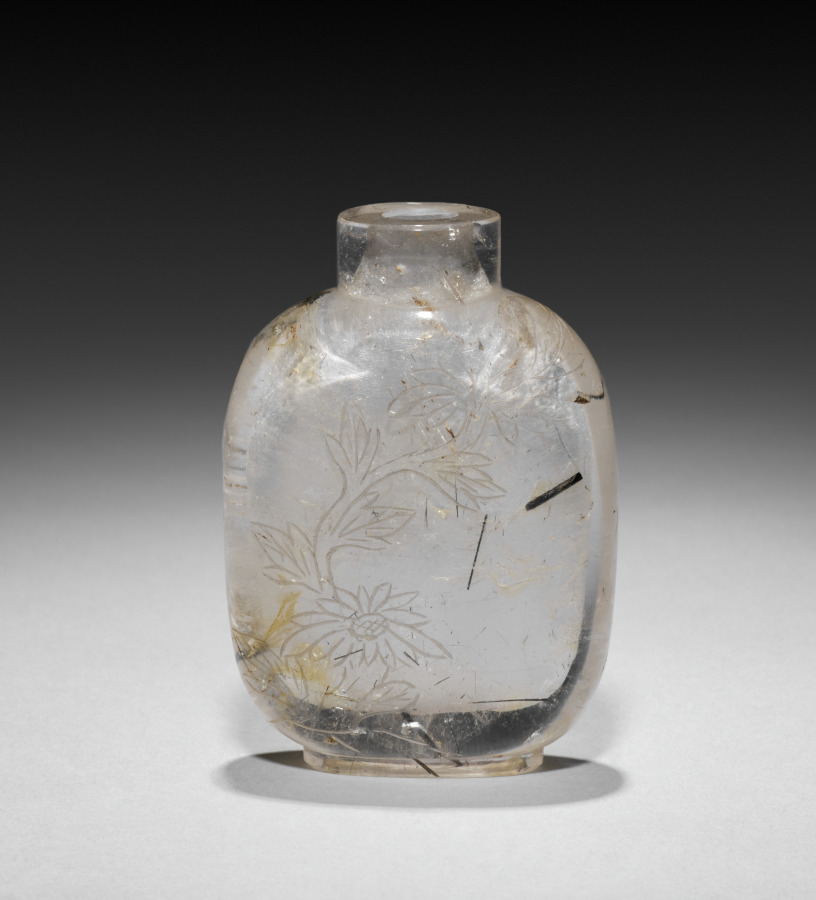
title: Snuff Bottle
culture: China, Qing dynasty (1644-1911)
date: 1644–1911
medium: glass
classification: Glass